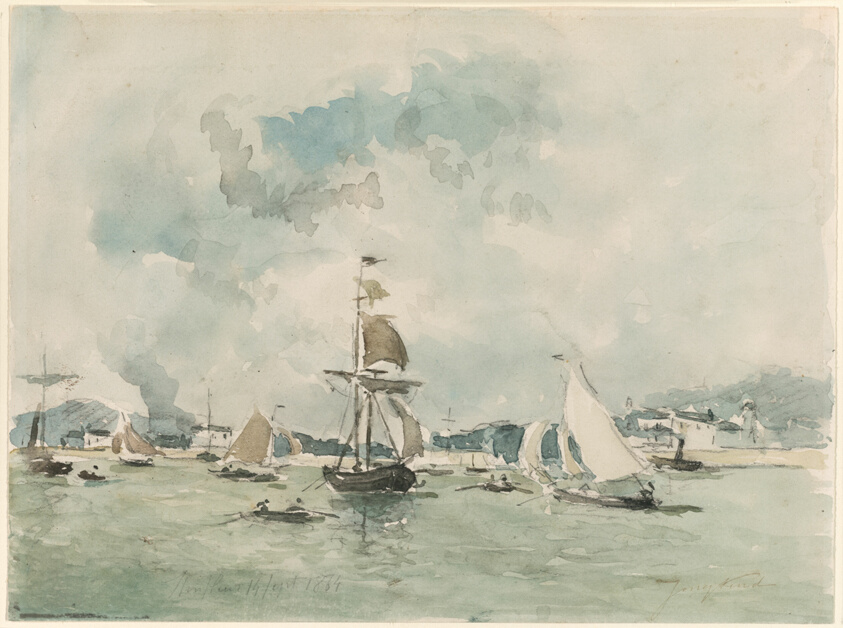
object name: Drawing and Watercolor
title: The Port of Honfleur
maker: Jean Barthold Jongkind; Dutch, 1819–1891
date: September 14, 1864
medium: Watercolor, with traces and black chalk, on cream wove paper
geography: Netherlands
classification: prints and drawing; chalk; watercolor; drawings (visual works)